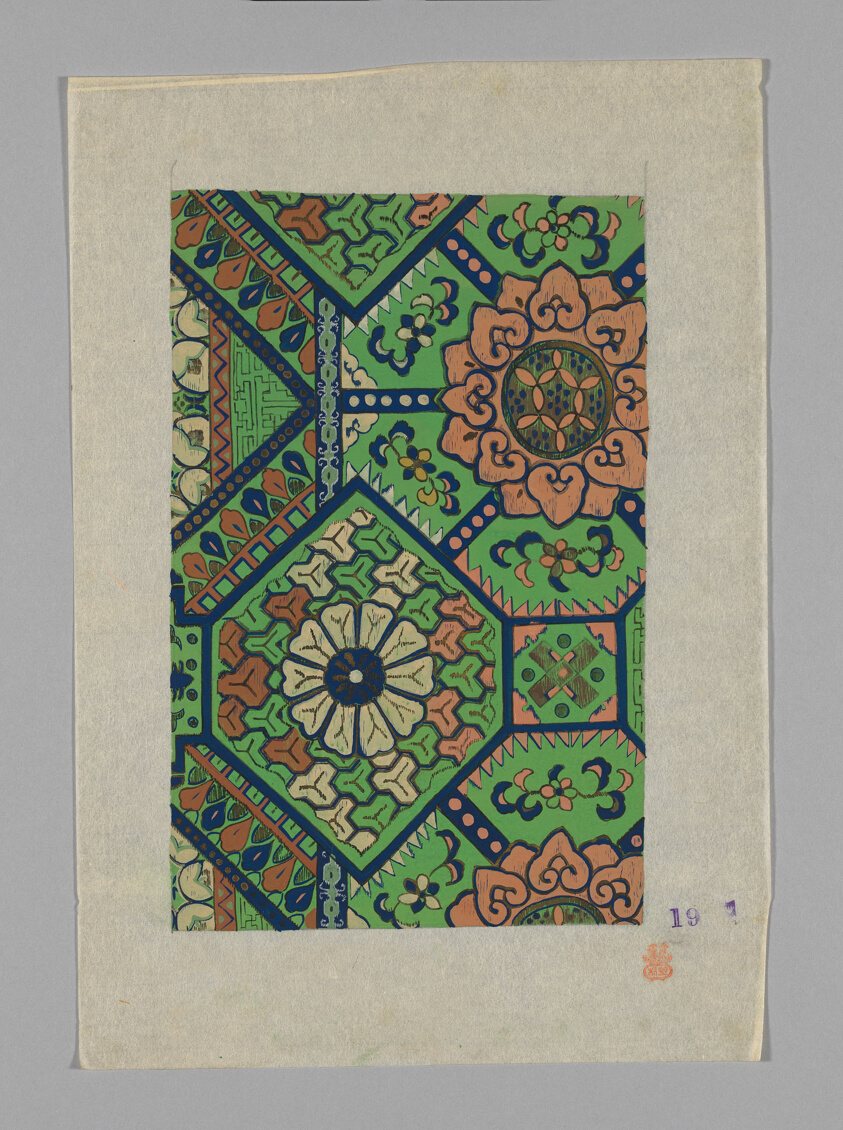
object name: Drawing and Watercolor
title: Design on Paper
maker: Japan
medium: Paper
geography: Japan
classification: textile; accessory - paper design; watercolor; paper